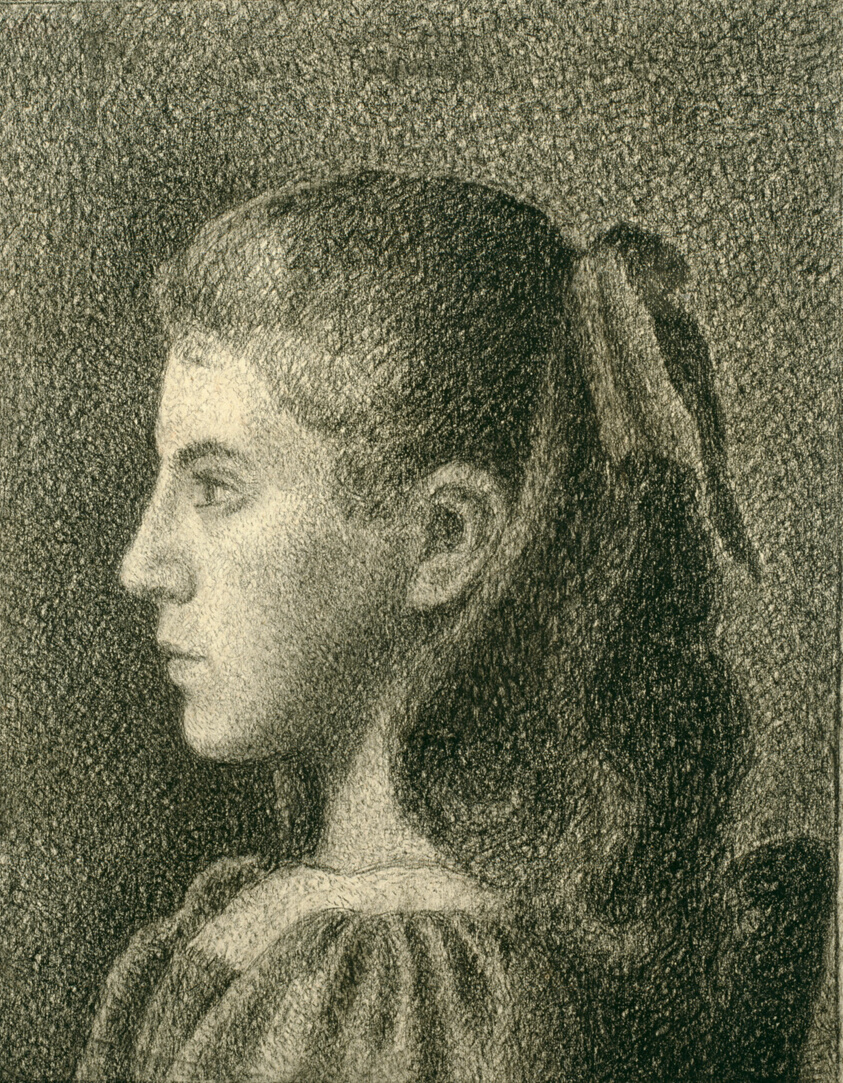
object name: Drawing and Watercolor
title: Portrait of Berthe Serruys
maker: Georges Lemmen (Belgian, 1865-1916)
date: 1894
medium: Conté crayon on cream wove paper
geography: Belgium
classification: chalk; drawings (visual works); prints and drawing